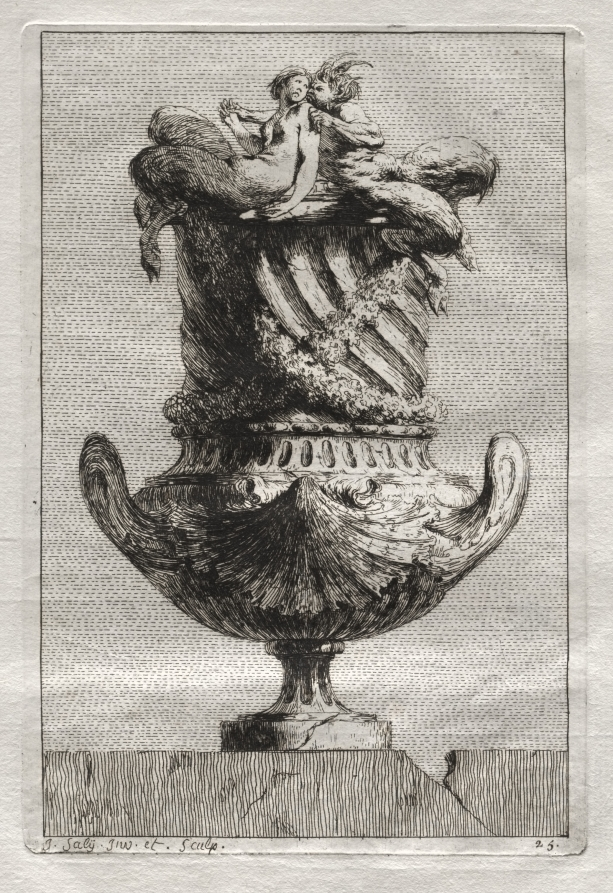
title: Suite of Vases: Plate 25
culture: France, 18th century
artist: Jacques François Saly (French, 1717–1776)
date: 1746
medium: etching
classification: Print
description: Designing ornamental vases or urns was particularly popular during the mid-18th century since the only limit to the possibilities was the imagination of the artist. Saly, a sculptor by training, was a student at the French Academy in Rome from 1740 to 1746, at which time he published a set of 30 etchings. Saly began with basic antique vase forms but deviated from classical ornament to use a rich variety of fantastic creatures for embellishment.